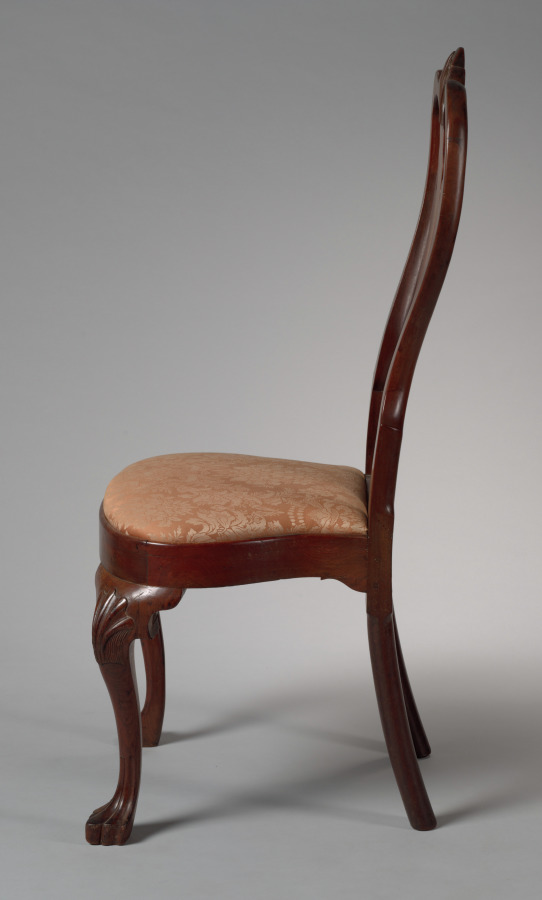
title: Side Chair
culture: America, Pennsylvania, Philadelphia, Queen Anne style, 18th century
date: 1735–1745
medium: walnut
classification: Furniture and woodwork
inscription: inscribed rear seat rail: "VIII."